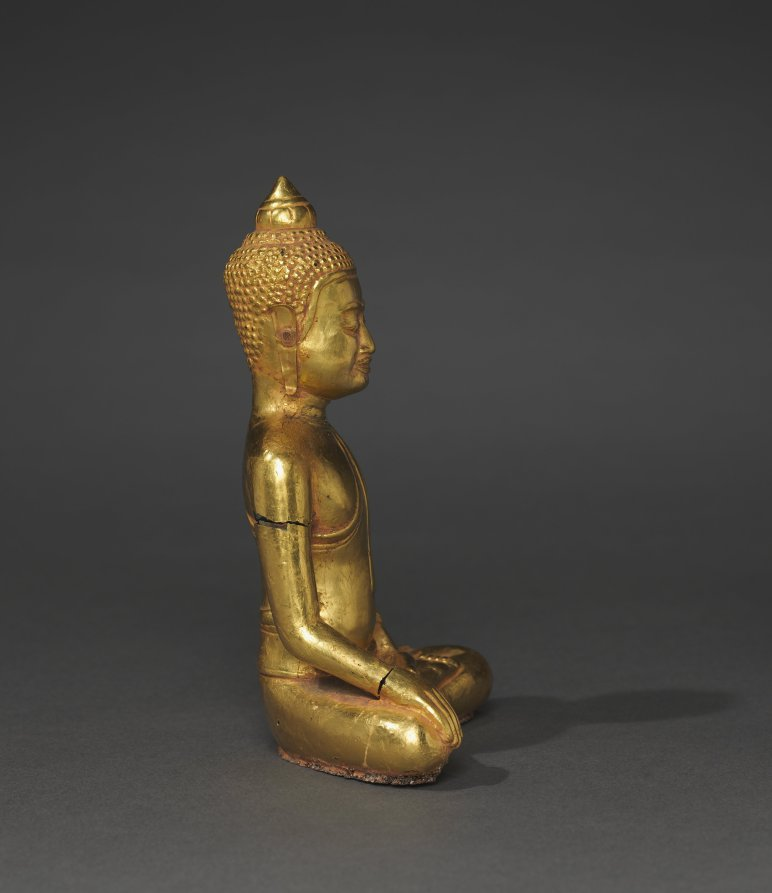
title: Seated Buddha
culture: Thailand, Ayutthaya, Wat Ratchaburana, 14th century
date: before 1424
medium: gold with resin core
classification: Sculpture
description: This pristinely modeled Buddha was fashioned from a sheet of 24-karat gold, using the repoussé (hammering) technique. The figure is filled inside with a resin core. The style is typical of the last phase of Khmer art (800s–1400s), the Lapburi style, which combines characteristics of both Cambodian and Thai sculptural styles.